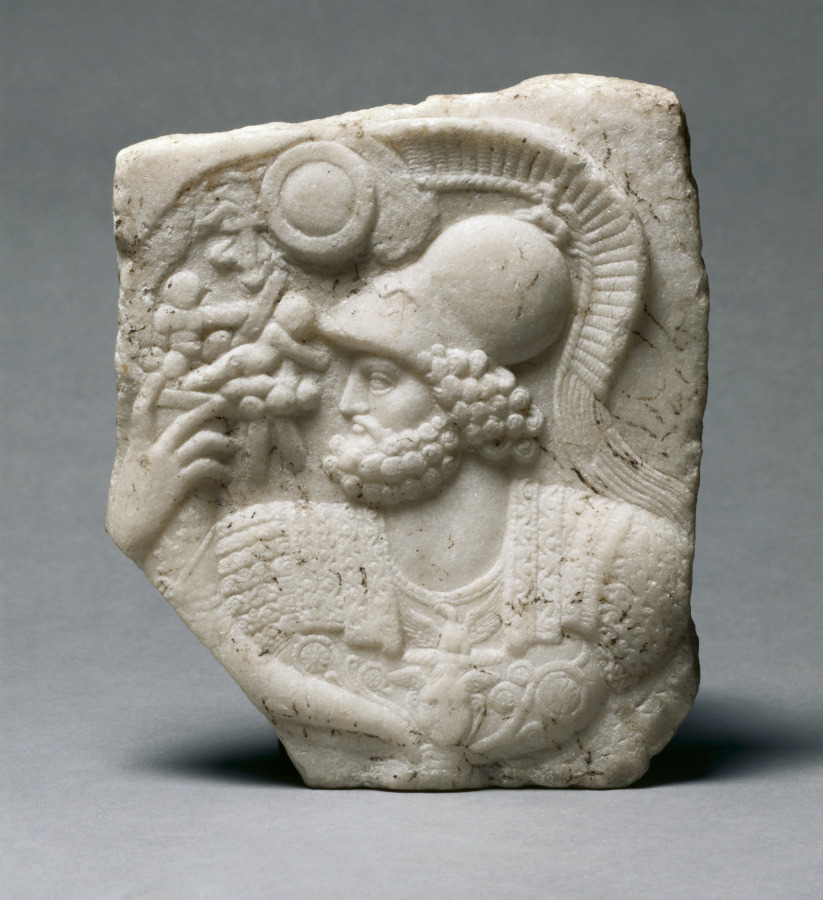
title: Relief of Mars Ultor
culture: Italy, Roman, Augustan period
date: 26 BCE–14 CE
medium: marble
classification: Sculpture